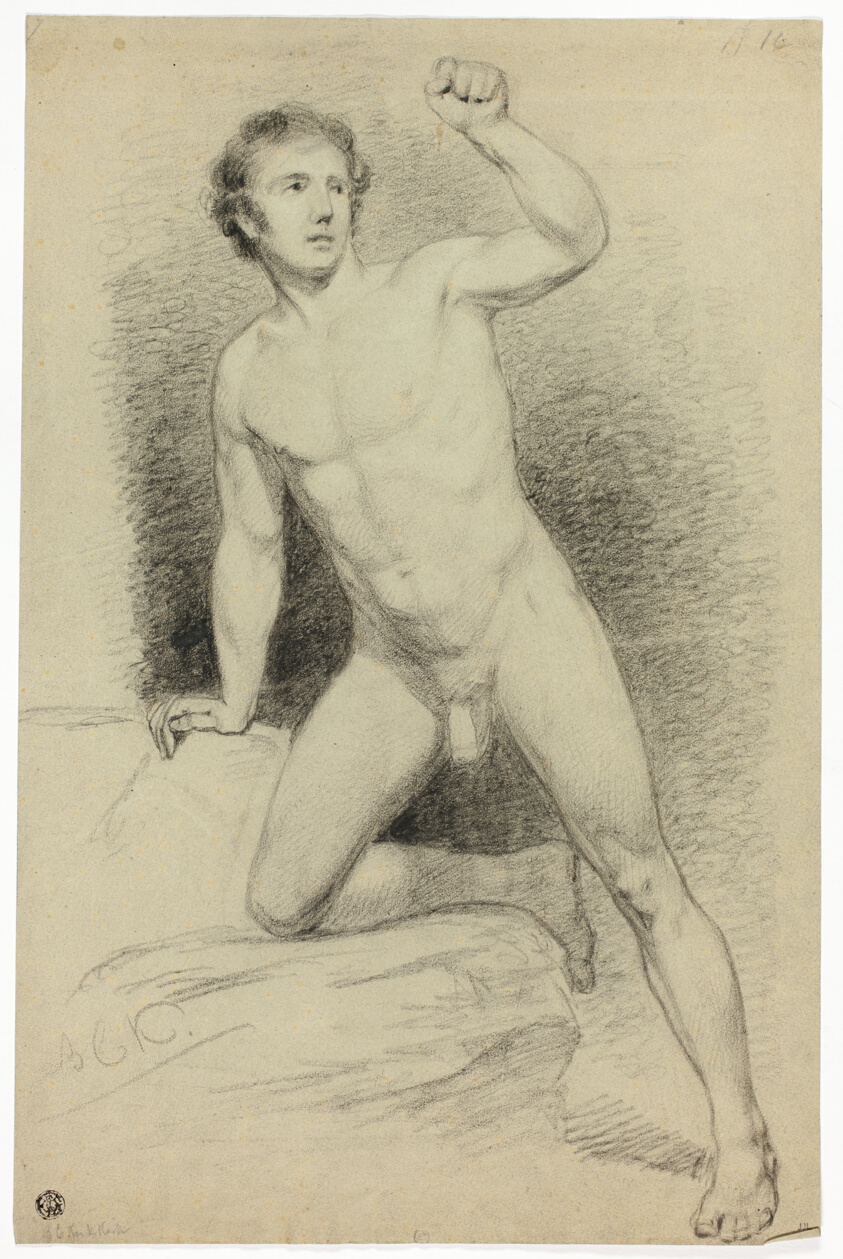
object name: Drawing and Watercolor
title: Academic Male Nude Leaning on Platform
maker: Barend Cornelis Koekkoek (Dutch, 1803-1862)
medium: Black crayon on buff wove paper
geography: Holland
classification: crayon; paper; drawings (visual works); prints and drawing